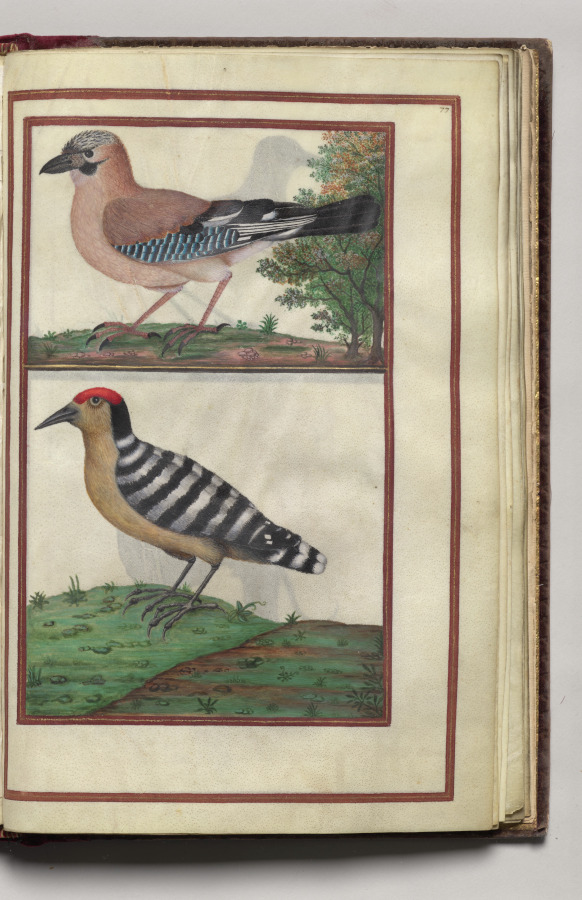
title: Woodpeckers, folio 37 (recto), from Florilegium (A Book of Flower Studies)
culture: France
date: 1608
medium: watercolor, ink, silver, and gold over occasional traces of pencil, on vellum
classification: Bound Volume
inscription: Dated: Poitiers 1608 (on frontispiece) Signed: On frontispiece in black ink, lower right: Van Kuyk Notation on drawing: Frontispiece: in pencil, lower margin: * élève de Van Kessel, peintre flammand (* in pencil also appears in front of Van Kuyk's name).